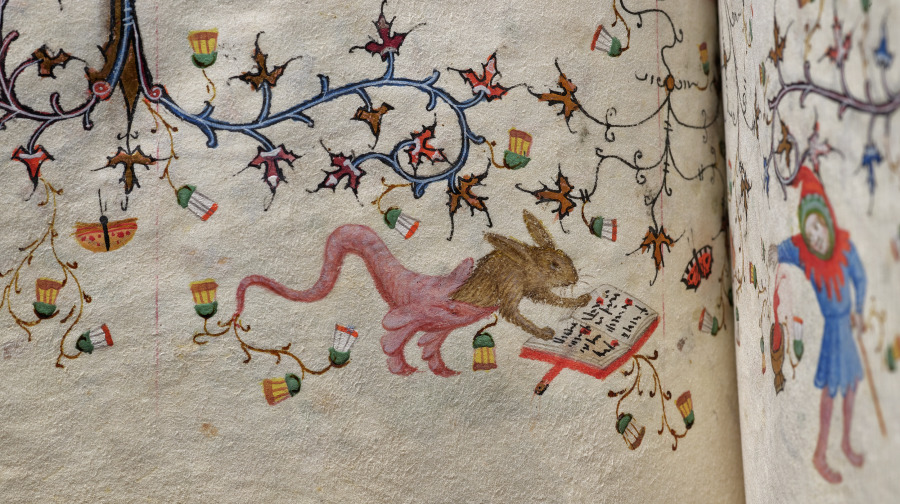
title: Hours of Charles the Noble, King of Navarre (1361-1425): fol. 93v, Text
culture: France, Paris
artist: Master of the Brussels Initials and Associates (French)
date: c. 1405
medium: ink, tempera, and gold on vellum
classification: Bound Volume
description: This precious volume was obviously highly prized by its owner, the French-born King of Navarre, who had his coat of arms painted on no less than twenty folios. Rather than directly commissioning this manuscript from a specific workshop, it seems that Charles the Noble acquired his book of hours -- perhaps ready-made for the luxury market -- while on a trip to Paris in 1404-05. A collaborative effort, six painting styles are evidenced within the pages of this codex, those of two Italians, two Frenchmen, and two Netherlanders. The painter who was responsible for the planning and decoration of the book, and who produced seventeen of the large miniatures, was a Bolognese artist known as the Master of the Brussels Initials. His principal assistant, responsible for most of the borders, was a Florentine who signed his name "Zecho" da Firenze on folio 208 verso.